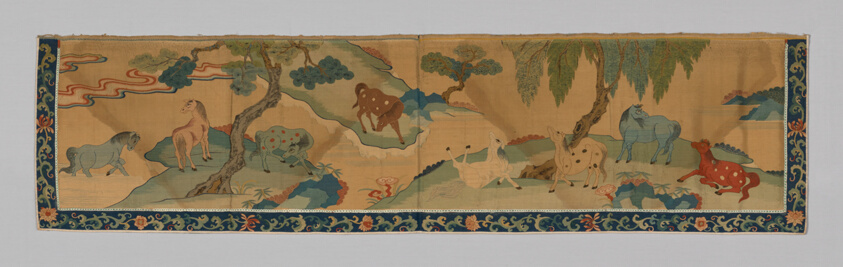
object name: Textile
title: Valance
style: qianlong, qing, Chinese (culture or style), East Asian, asian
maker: China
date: Qing dynasty (1644–1911), 1790/1820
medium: silk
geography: China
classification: weaving - tapestry; weaving; textile